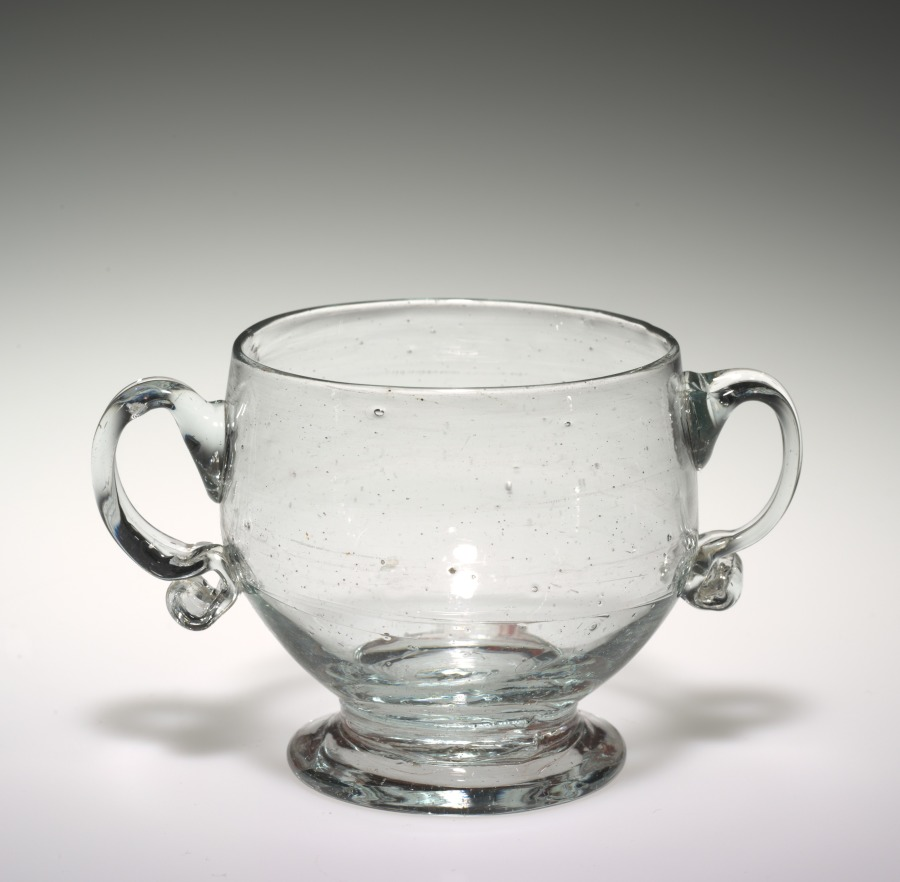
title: Sugar Bowl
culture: America, Southern New Jersey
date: c. 1780–1830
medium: glass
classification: Glass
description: Much glass of this type was produced in Southern New Jersey in the late 18th and early half of the 19th century because of the abundance of raw materials for glassmaking found there. Neoclassical shapes for sugar bowls and vases were popular forms in blown glass of the early 19th century.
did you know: This sugar bowl is most likely missing its cover.